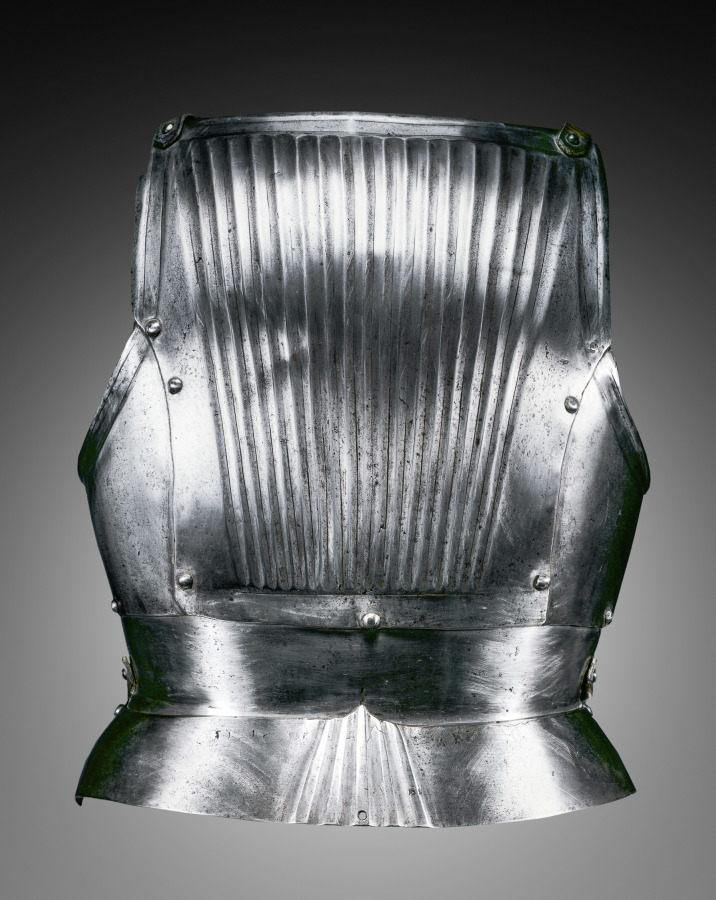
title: Backplate in the Maximilian Style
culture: Germany, Nuremberg(?), early 16th century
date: c.1510–30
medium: steel, brass rivets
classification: Arms and Armor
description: Distinguished by its regularly fluted surfaces, armor in this style was popularized in South Germany during the early 1500s. The style is usually called "Maximilian," as it was introduced during the reign of Emperor Maximilian I (1493-1519). The style reflects male costume of the period and the shift to the new rounded forms of the Renaissance. Other examples of this armor style may be seen nearby.